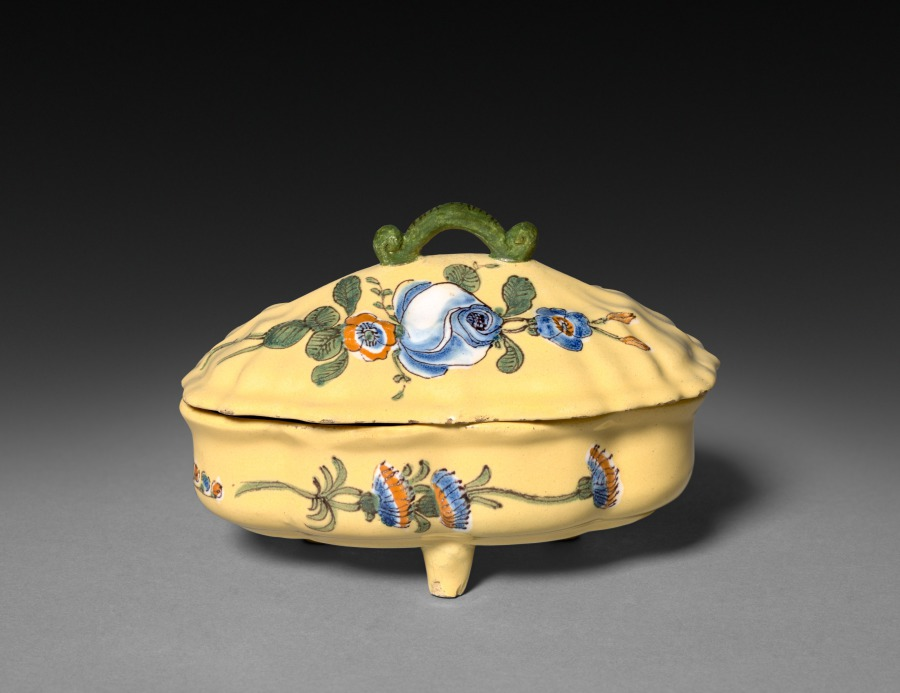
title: Covered Spice Bowl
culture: France, Montpellier, 18th century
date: c. 1775–80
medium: faience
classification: Ceramic